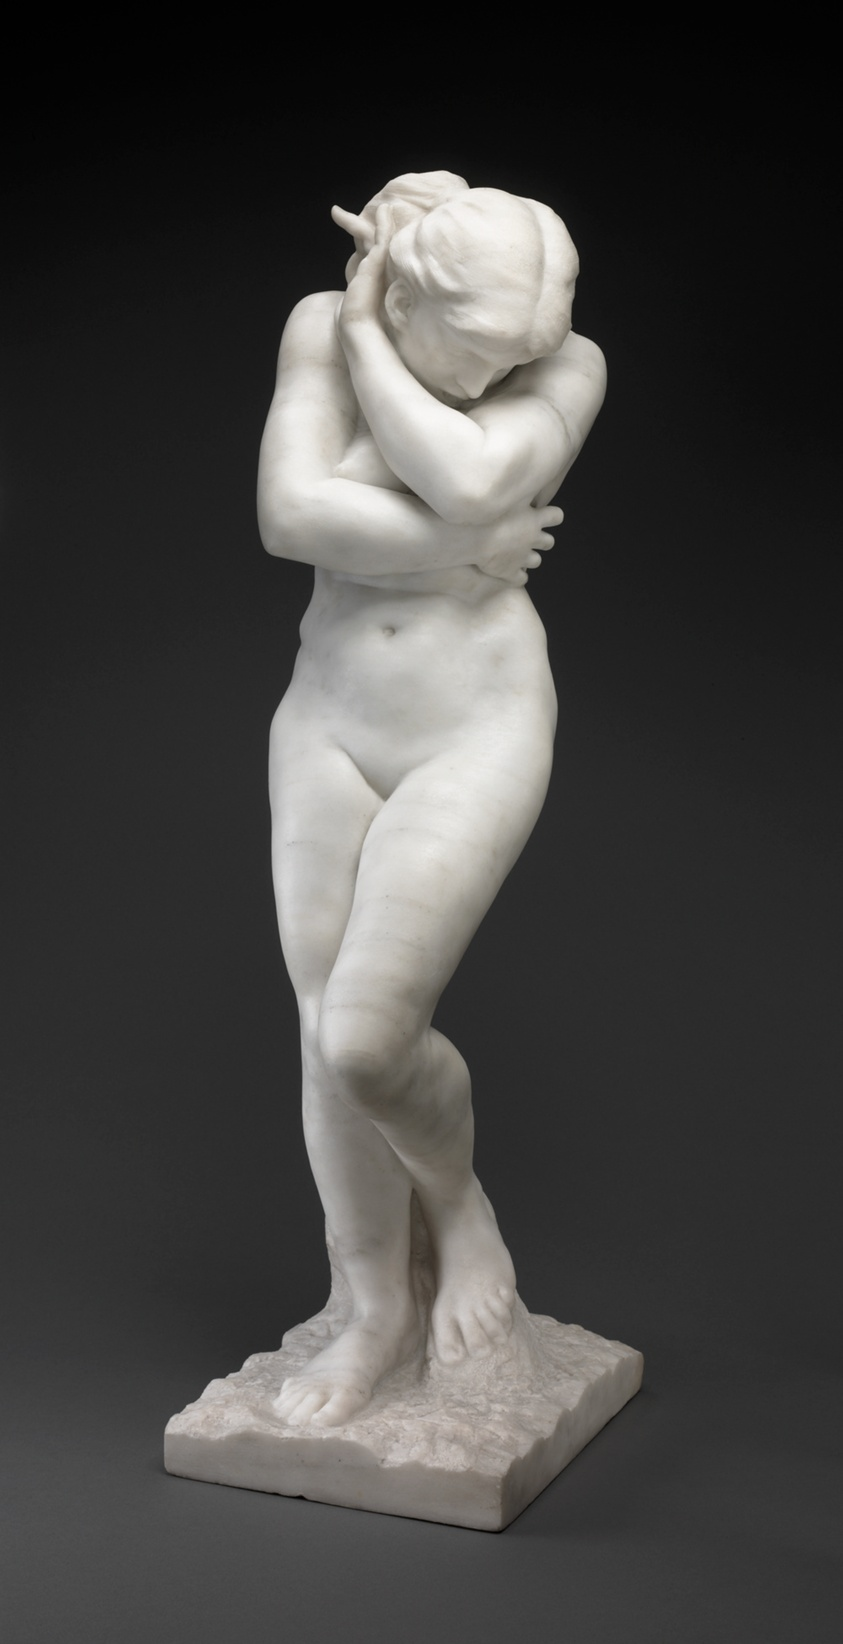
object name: Sculpture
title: Eve after the Fall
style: nineteenth century, 19th century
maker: Auguste Rodin (French, 1840–1917)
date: Modeled 1883, carved c. 1886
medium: Marble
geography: France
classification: statuette; sculpture; figure; french; marble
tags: Eve (Biblical), nudes, woman, genesis, religious figures, figure, biblical, religion